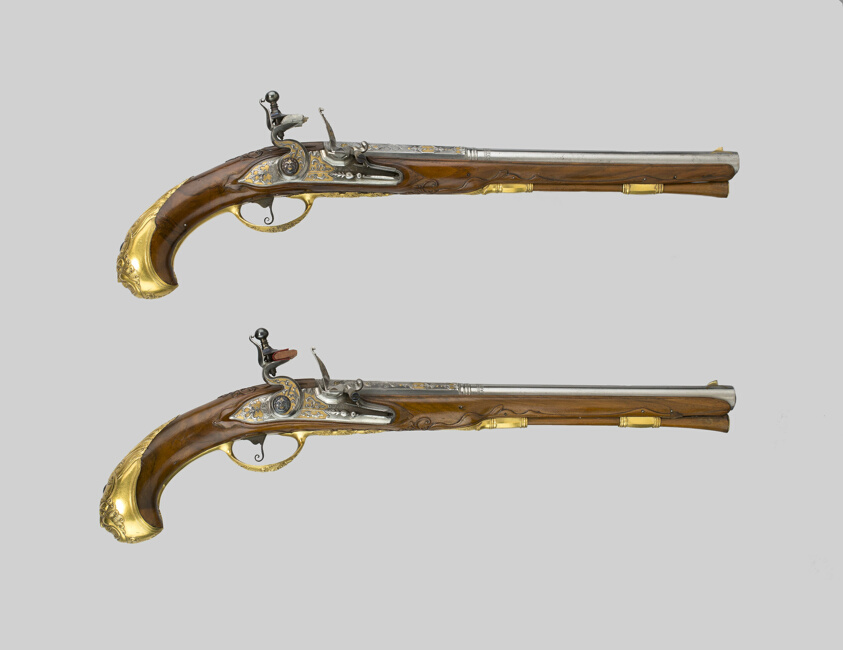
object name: Arms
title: Pair of Flintlock Pistols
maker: Johann Jacob Behr; Flemish, Maastricht or Liège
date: 1700/30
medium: Walnut, brass, and gold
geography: Germany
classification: firearm-handgun; arms; arms and armor